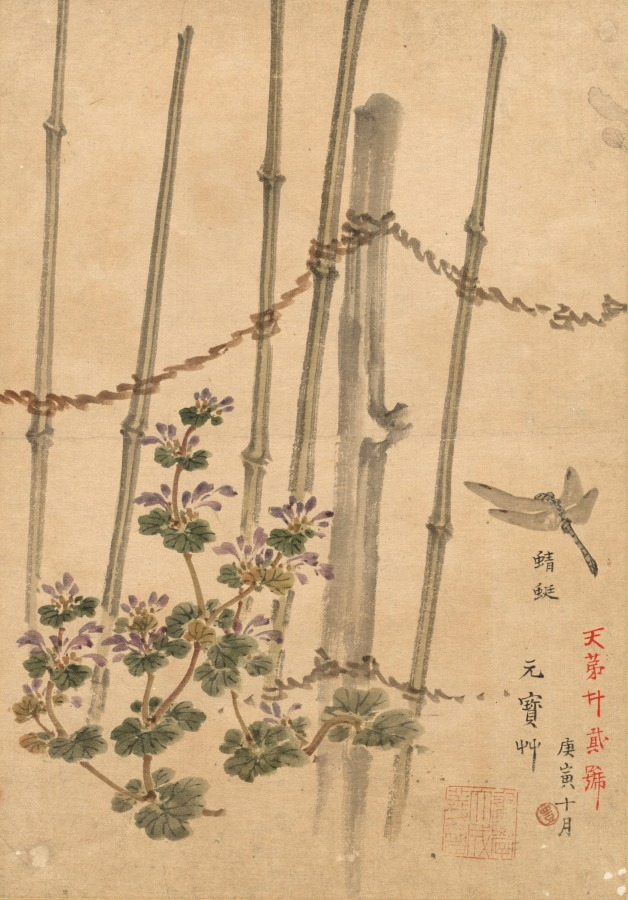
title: Bamboo Fence and Chrysanthemums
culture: Japan, Meiji period (1868–1912)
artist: Kono Bairei (Japanese, 1844–1895)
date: 1890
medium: ink and color on paper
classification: Drawing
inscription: inscription dated to 1890 lower right